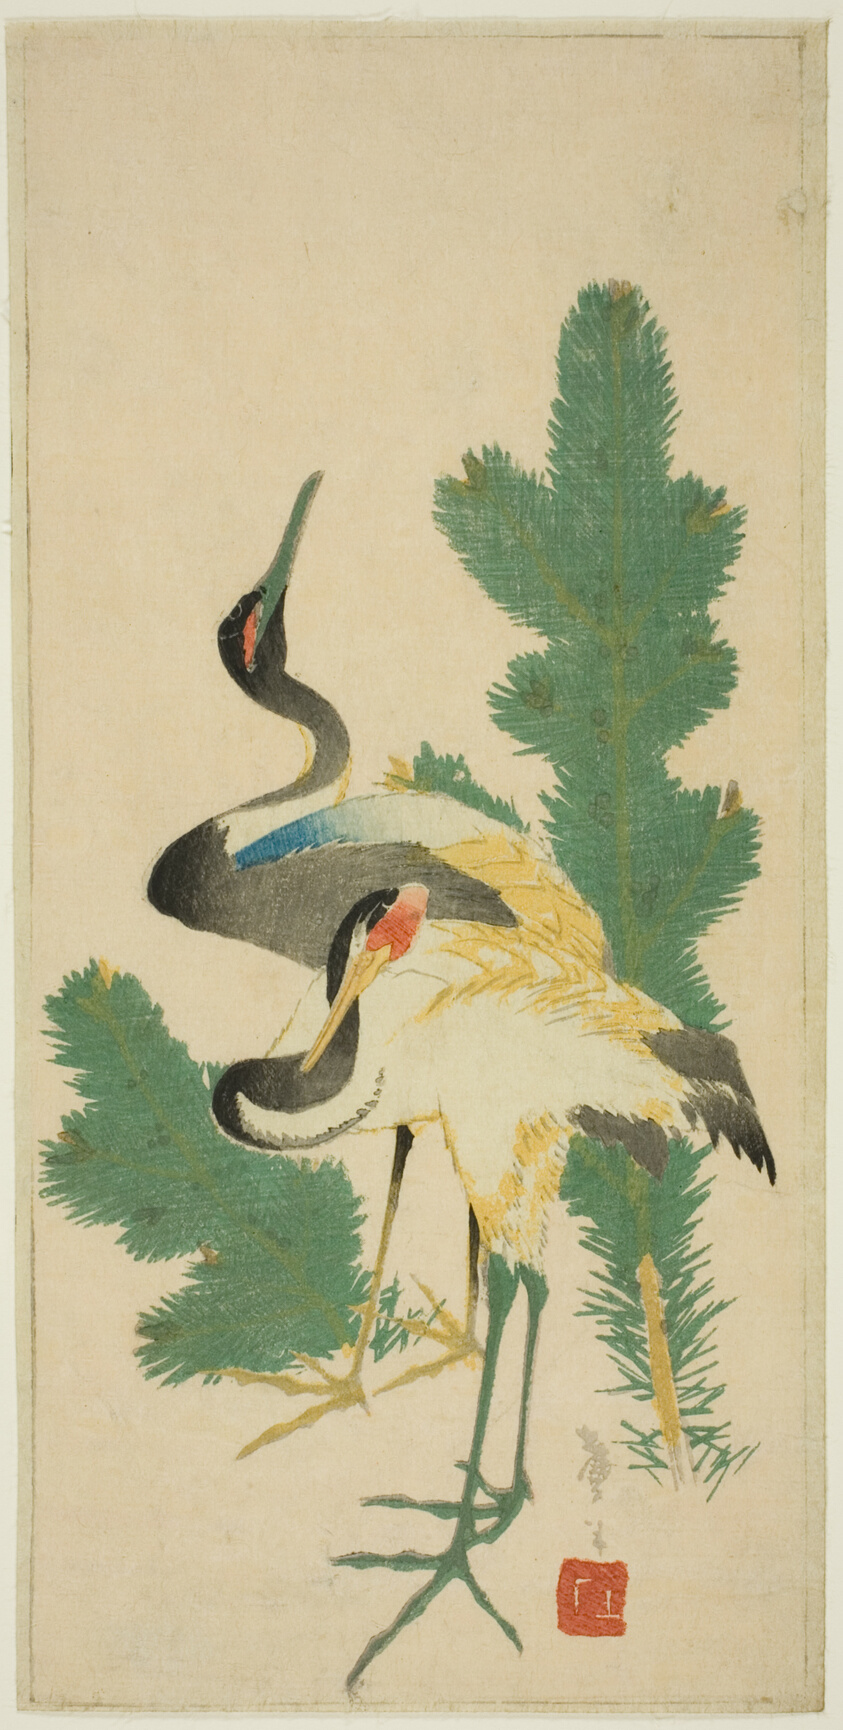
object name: Print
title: Pine and cranes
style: Japanese (culture or style)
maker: Katsushika Taito II (Japanese, active c, 1810–53)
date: c. 1830/44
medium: Color woodblock print; section of harimaze sheet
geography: Japan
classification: woodblock print; print; asian art